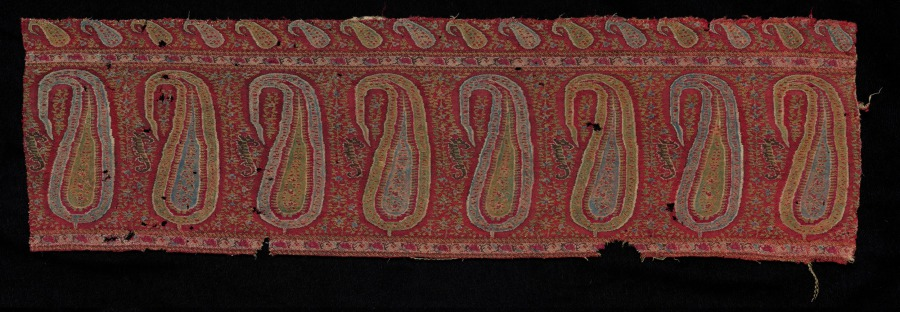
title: Border of a Shawl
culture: India, Punjab, 19th century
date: 1800s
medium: tapestry twill; wool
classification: Textile